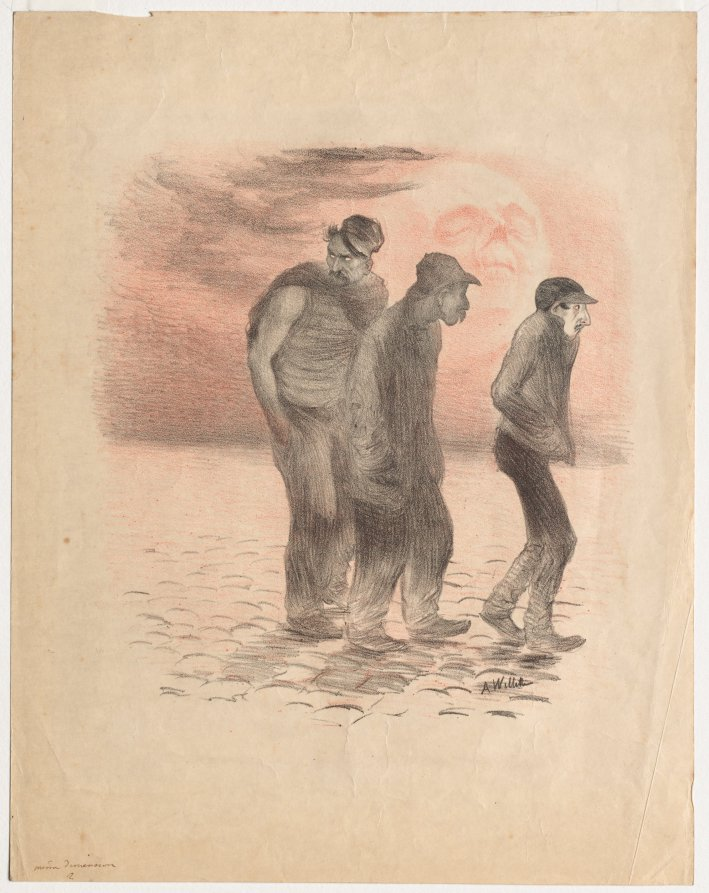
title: Paris Scenes and Murderers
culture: France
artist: Adolphe Léon Willette (French, 1857–1926)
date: 1800s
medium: lithograph printed in black and red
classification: Print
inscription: signed lower right in stone, "A. Willette"